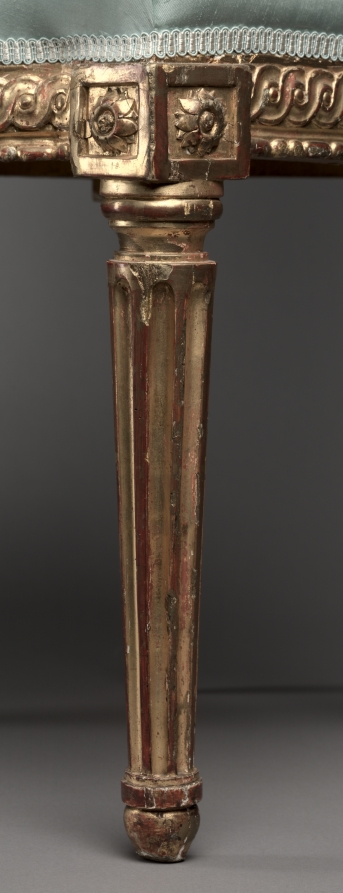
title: Side Chair (2 of 2)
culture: France, style of Louis XVI, 18th century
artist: Jean Baptiste fils Lelarge (French, 1743–1802)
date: 1700s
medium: gilded wood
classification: Furniture and woodwork